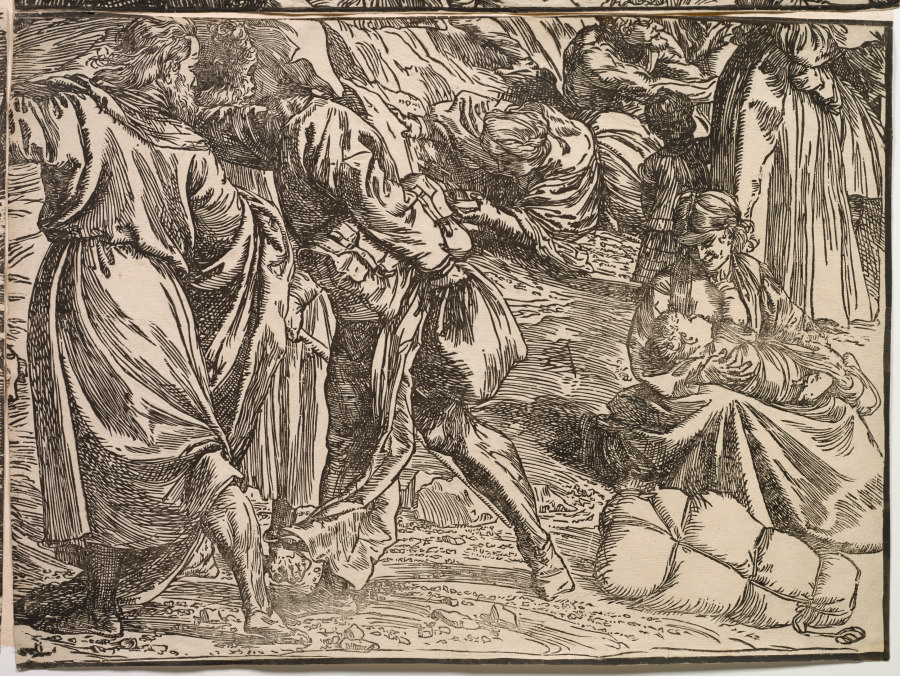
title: The Submersion of Pharaoh's Army in the Red Sea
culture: Italy, Venice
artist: Titian (Italian, c. 1488–1576)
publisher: Domenico dalle Greche (Italian, 1503–1603)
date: 1514–15, printed 1549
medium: woodcut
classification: Print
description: To make this monumental woodcut—considered one of the most ambitious prints of the Renaissance—Titian probably drew directly on the wooden blocks, after which a skilled cutter completed the blocks. The size rivals that of a painting, and the composition would have hung on a wall. Titian’s bold vision presents nature as a vehicle of God’s mercy and wrath. Moses, at right, having parted the seas for the Israelites to pass, commands them to close over the Egyptian forces (Exodus 14:21–31). Titian propelled the narrative with remarkable unity, dedicating entire blocks to the turbulent sea and rolling clouds that culminate in a magnificent cliff and Renaissance city. Some have interpreted the scene as an allegory of Venice’s troubles with the League of Cambrai, a military alliance that threatened the island city.